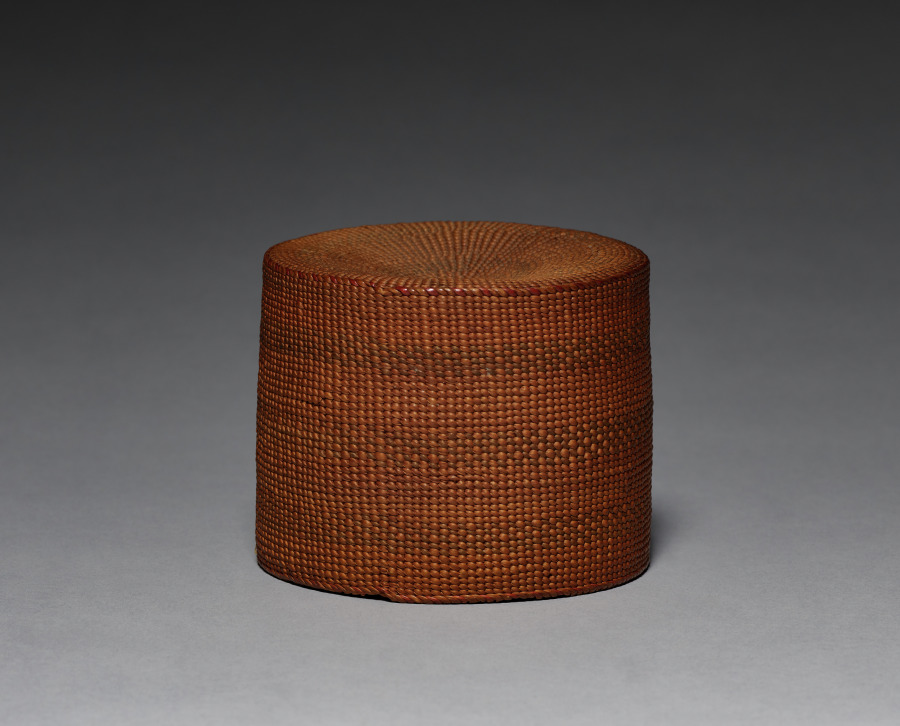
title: Telescoping Basket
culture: Northwest Coast, Tlingit, 19th century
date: 1800's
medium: twined spruce root with grass false embroidery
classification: Basketry